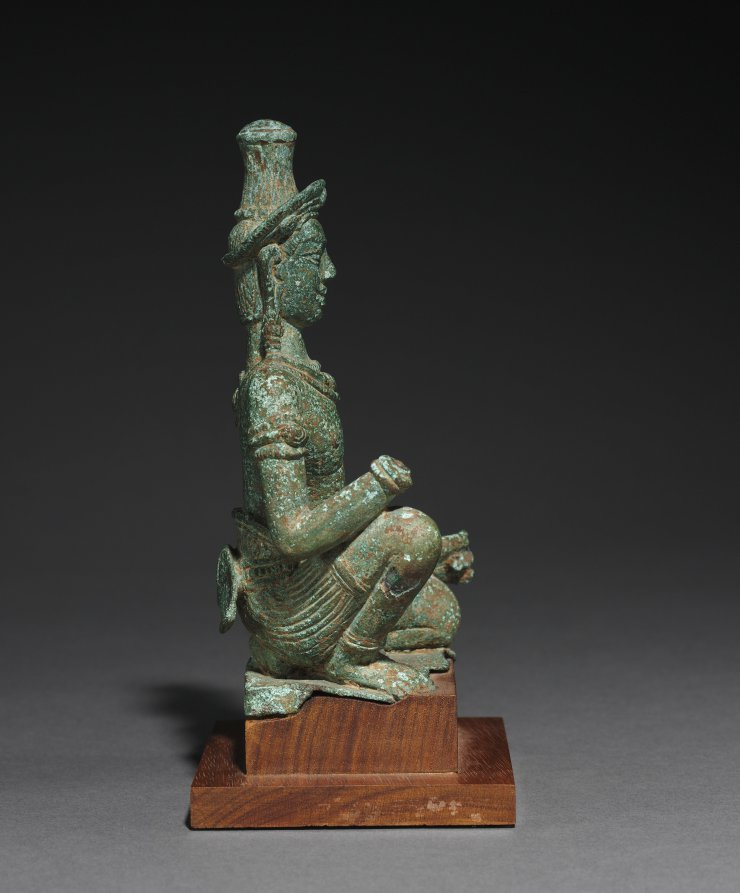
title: Kneeling Worshipper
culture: Cambodia, Angkor Wat style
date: 1100s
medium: bronze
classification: Sculpture